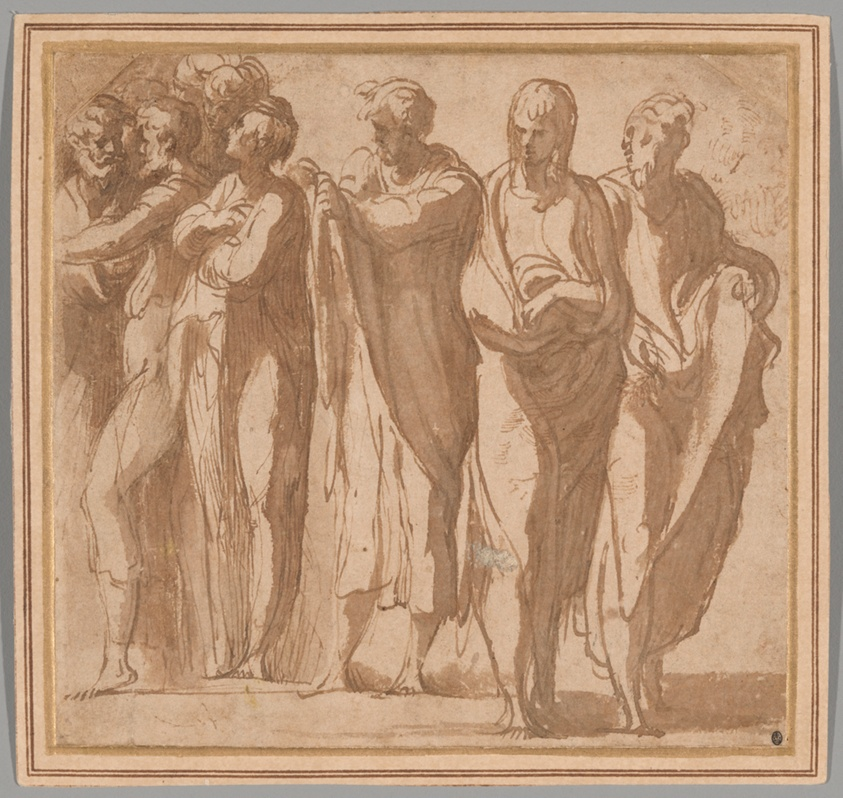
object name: Drawing and Watercolor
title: Group of Nine Standing Figures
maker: Francesco Mazzola, called Parmigianino; Italian, 1503-1540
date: 1524/27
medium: Pen and brown ink and brush and brown wash, on tan laid paper, laid down on tan laid card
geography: Italy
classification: ink and wash; drawings (visual works); prints and drawing